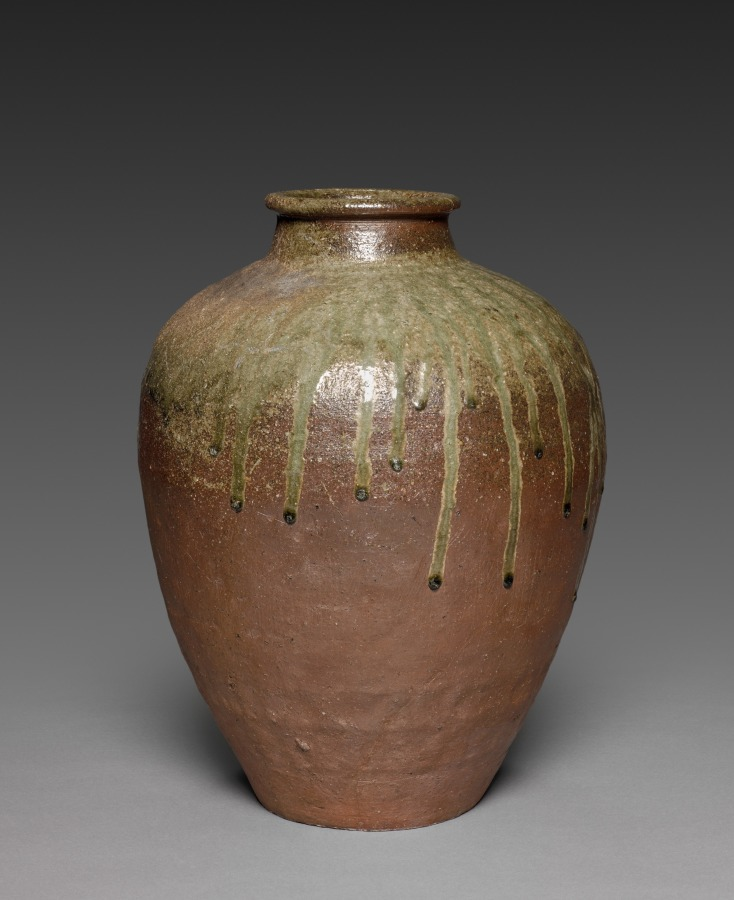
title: Water Jar: Ko Tamba ware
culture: Japan, Muromachi period (1392–1573)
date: mid-1500s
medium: stoneware with natural green ash glaze (Tamba ware)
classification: Ceramic